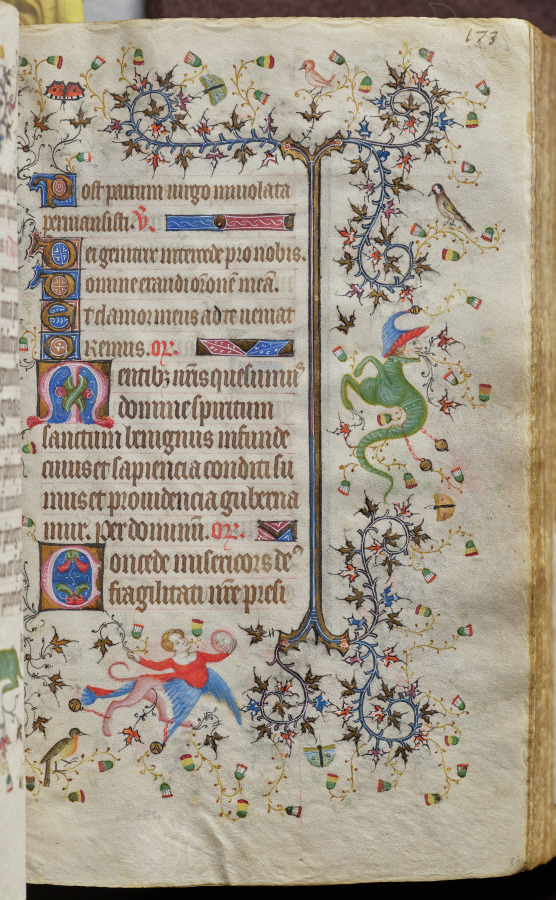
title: Hours of Charles the Noble, King of Navarre (1361-1425): fol. 87r, Text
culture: France, Paris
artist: Master of the Brussels Initials and Associates (French)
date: c. 1405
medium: ink, tempera, and gold on vellum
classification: Bound Volume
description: This precious volume was obviously highly prized by its owner, the French-born King of Navarre, who had his coat of arms painted on no less than twenty folios. Rather than directly commissioning this manuscript from a specific workshop, it seems that Charles the Noble acquired his book of hours -- perhaps ready-made for the luxury market -- while on a trip to Paris in 1404-05. A collaborative effort, six painting styles are evidenced within the pages of this codex, those of two Italians, two Frenchmen, and two Netherlanders. The painter who was responsible for the planning and decoration of the book, and who produced seventeen of the large miniatures, was a Bolognese artist known as the Master of the Brussels Initials. His principal assistant, responsible for most of the borders, was a Florentine who signed his name "Zecho" da Firenze on folio 208 verso.